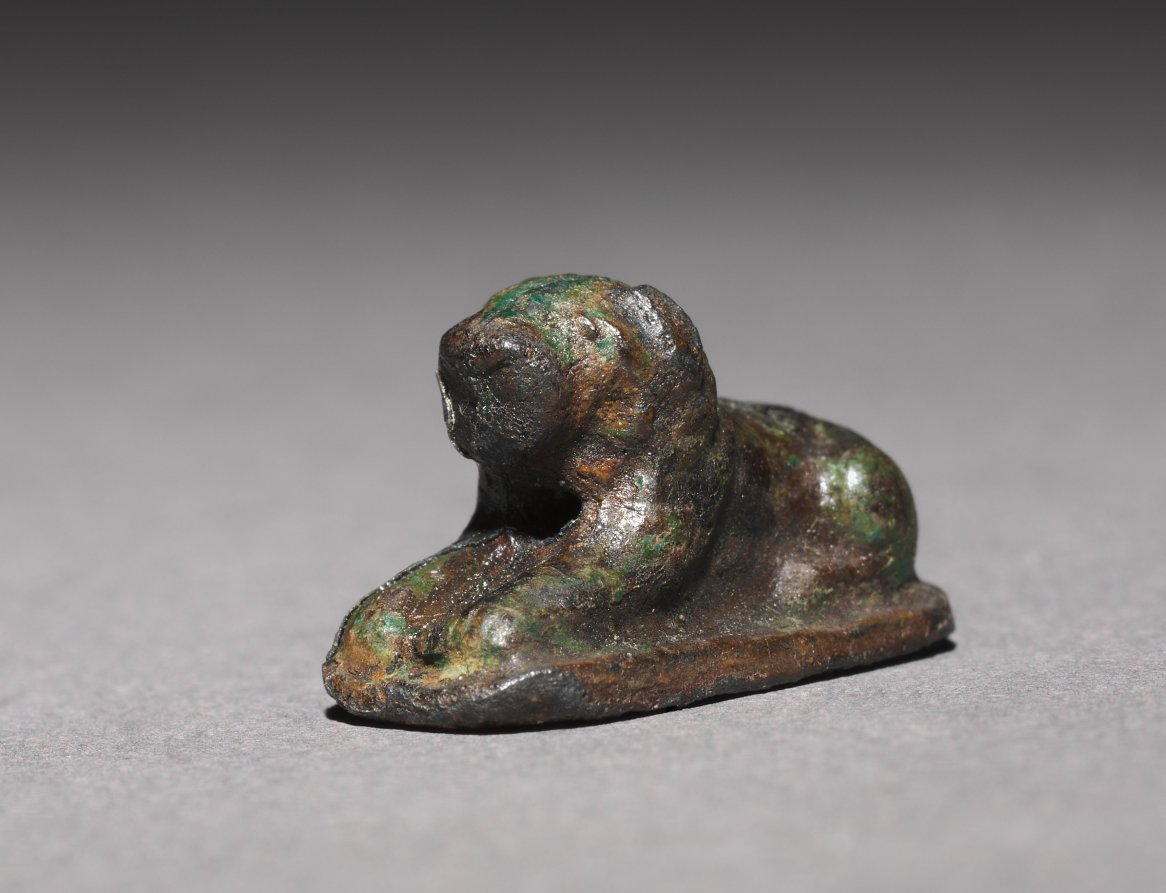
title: Recumbent Lion Bead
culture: Egypt, Middle Kingdom (2040–1648 BCE), Dynasty 12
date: 1980–1801 BCE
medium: silver foil over a clay-bulked resin core (?)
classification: Amulets